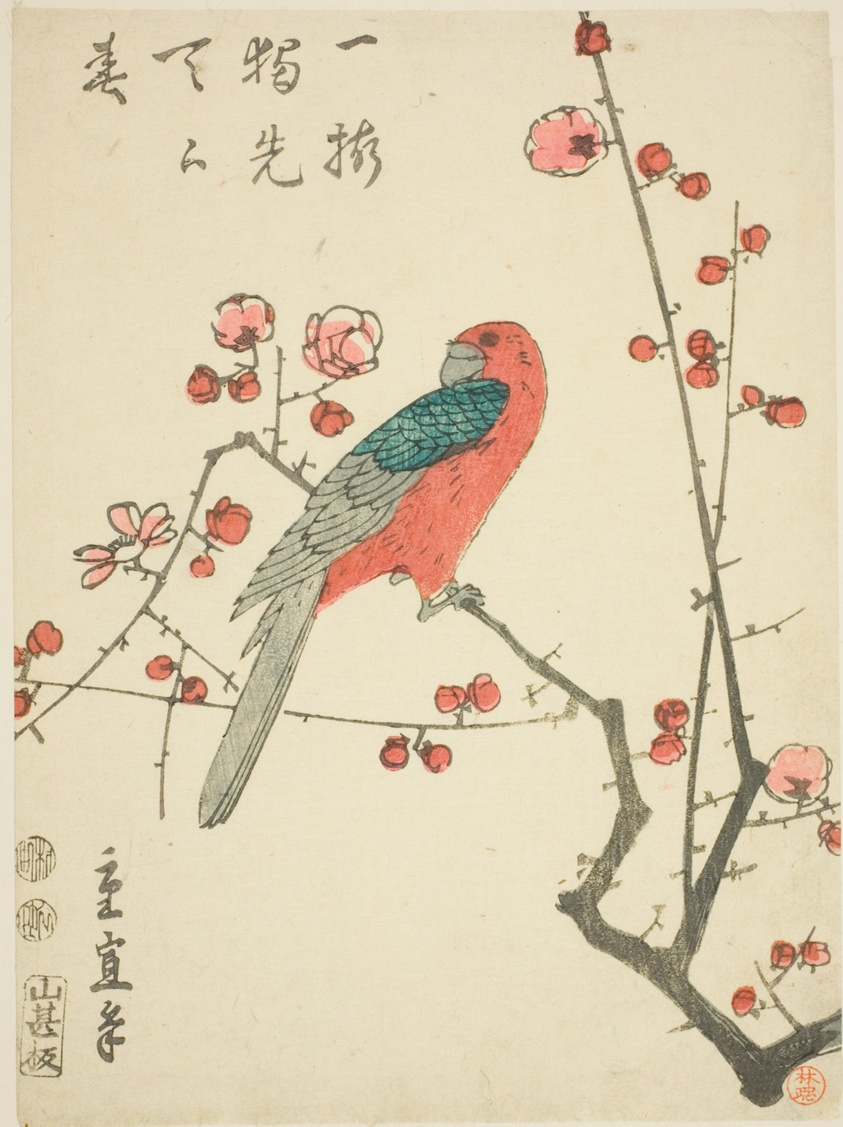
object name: Print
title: Parrot on plum branch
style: Japanese (culture or style)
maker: Utagawa Hiroshige II (Shigenobu) (Japanese, 1826–1869)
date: c. 1848/52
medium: Color woodblock print; koban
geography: Japan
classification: woodblock print; print; asian art